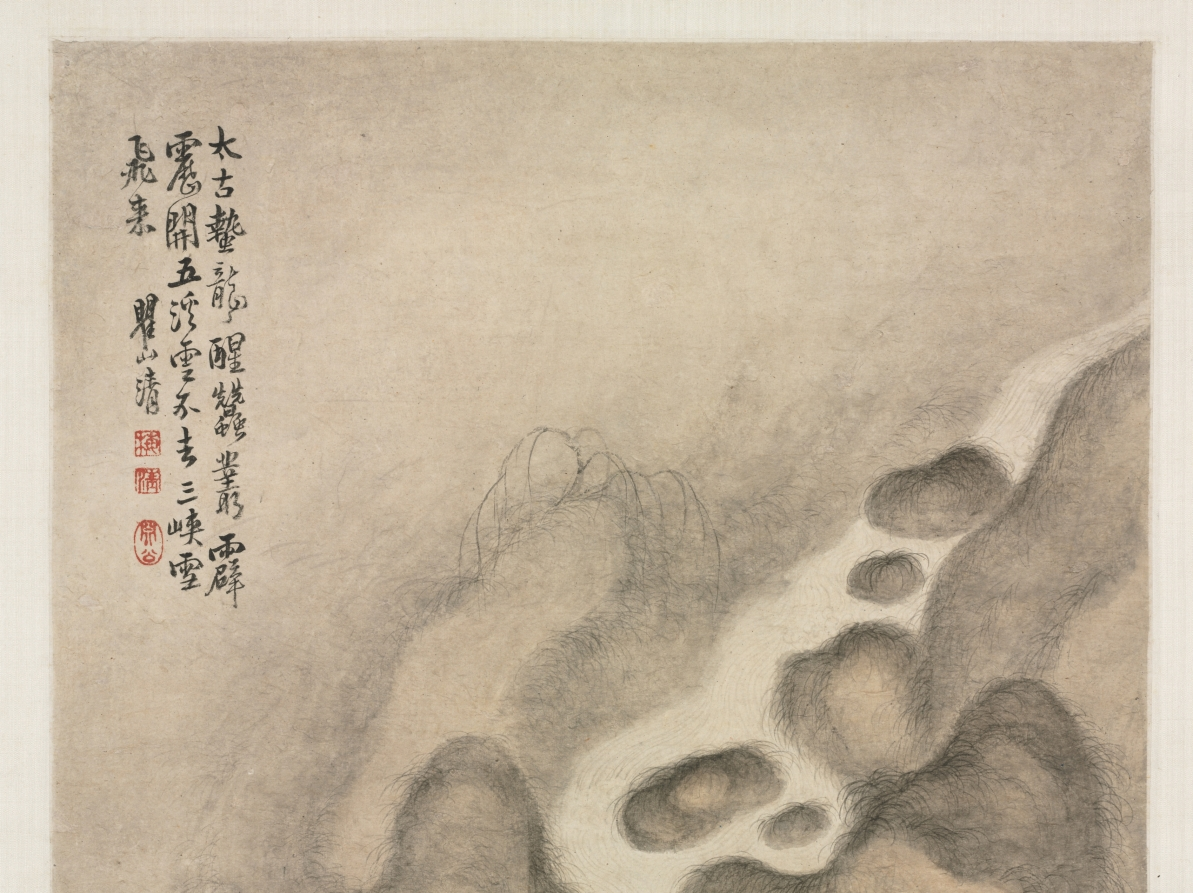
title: Nine Dragon Pool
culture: China, Qing dynasty (1644-1911)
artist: Mei Qing (Chinese, 1623–1697)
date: 1690s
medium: hanging scroll, ink and light color on paper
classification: Painting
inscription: 太古蟄龍醒，蠺叢霹靂開。 五溪雲不去，三峽雪飛來。 瞿山, 清。 [印] 梅清; 淵公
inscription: 2 additional seals: 1 of Dai Xi 戴煕 (1801–1860); 1 unidentified.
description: In the second half of the 1600s, Huangshan 黃山 (Mt. Huang or Yellow Mountain) attracted many visitors and inspired artists like Mei Qing. He probably sketched the Nine Dragon Pool on his second trip to the mountain range in 1690, at the advanced age of 68 sui. This dramatic waterfall has nine curves, each forming an emerald green pool. After heavy rain, the rushing water looks like nine white dragons.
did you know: Huangshan 黃山 is a UNESCO World Heritage site known for its spectacular rocky peaks, sea of clouds, oddly shaped pine trees, and hot springs.